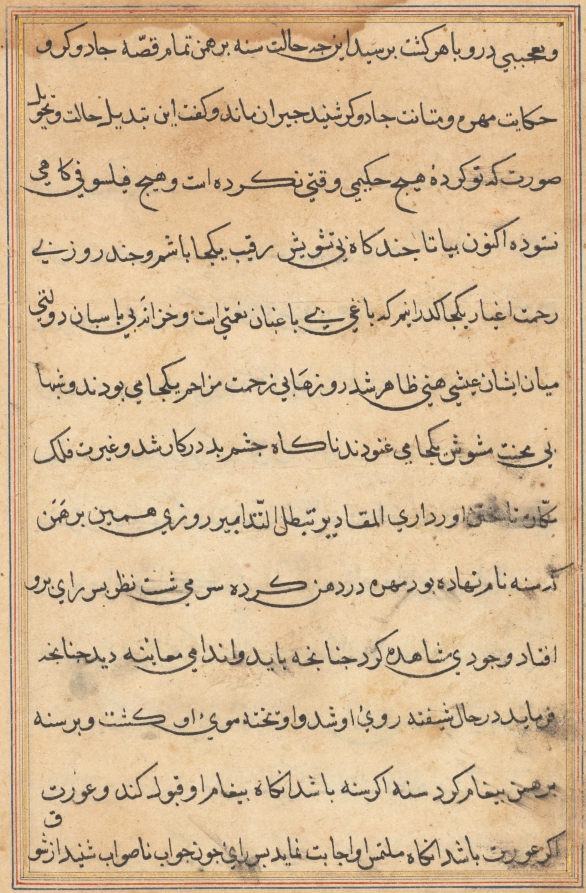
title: Page from Tales of a Parrot (Tuti-nama): text page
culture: Mughal India, court of Akbar (reigned 1556–1605)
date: c. 1560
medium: gum tempera, ink, and gold on paper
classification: Painting